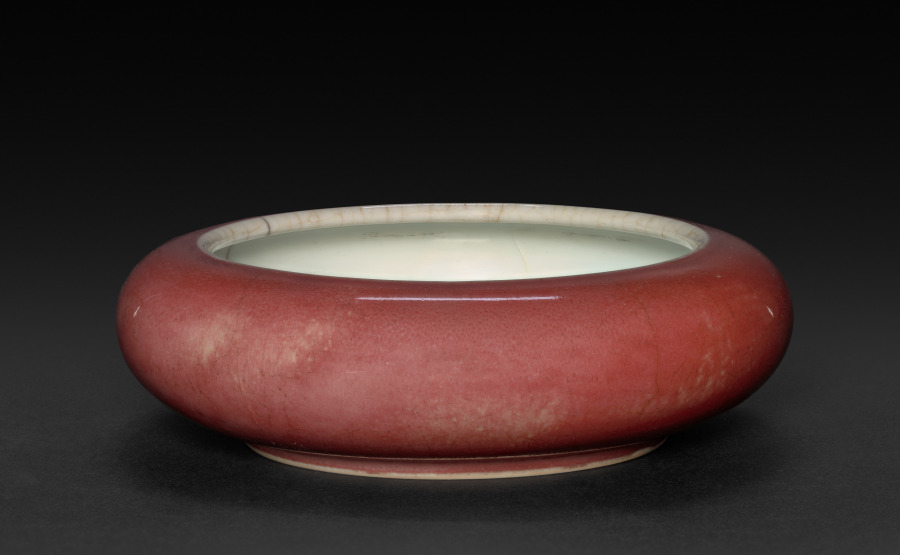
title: Gong-shaped Brush Washer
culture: China, Qing dynasty (1644-1911), Kangxi reign (1662-1722)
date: 1662–1722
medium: porcelain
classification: Ceramic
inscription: 大清康熙年製